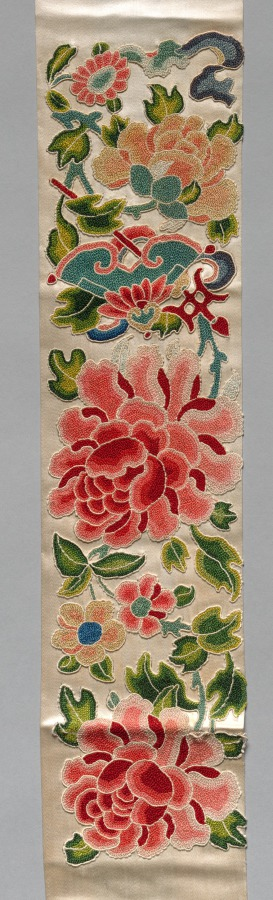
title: Sleeve Band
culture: China, Qing dynasty (1644-1911) or Republican period (1912-49)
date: 1880–1940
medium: Silk, embroidery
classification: Garment